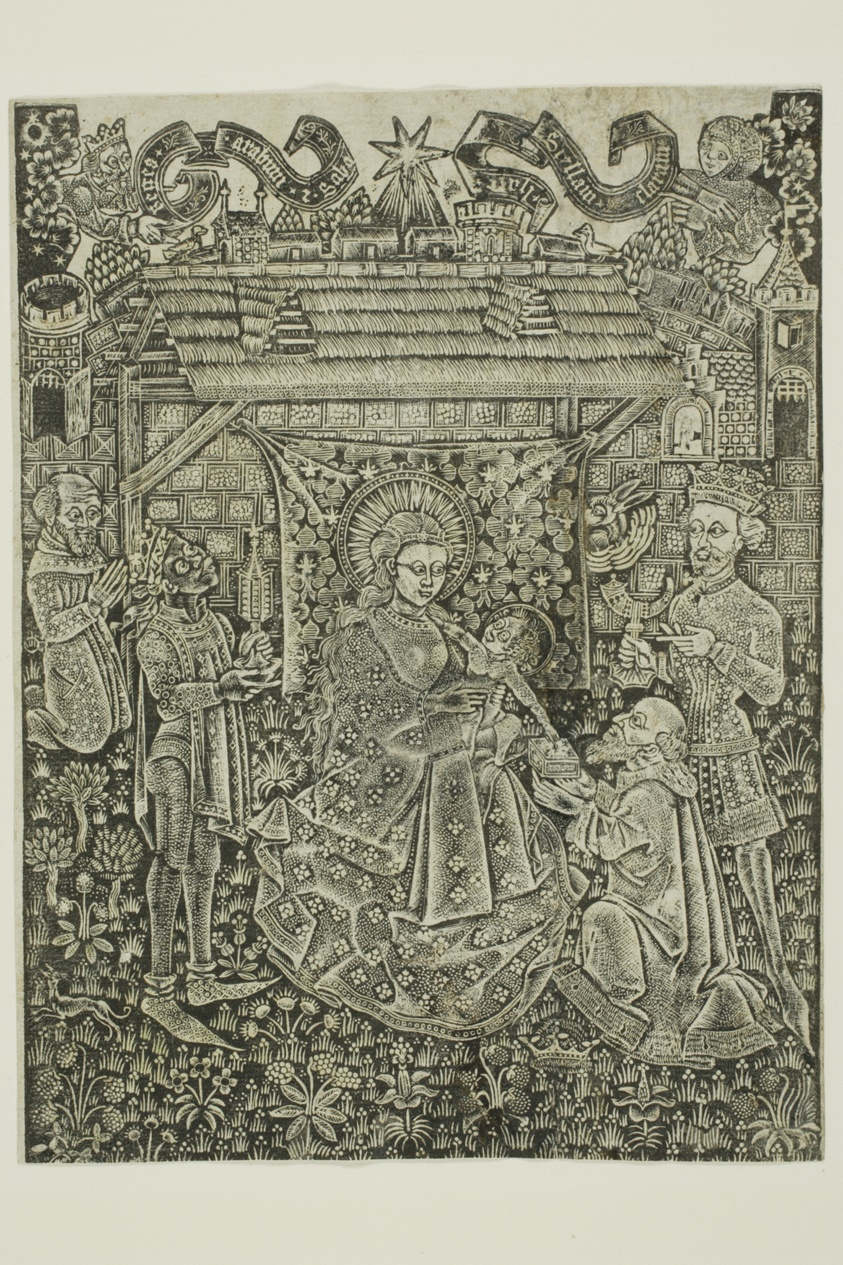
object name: Print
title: Adoration of the Magi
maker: Unknown Artist; German, 15th century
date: 1425–50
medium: Metalcut on paper (dotted manner)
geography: Germany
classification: engraving; print; prints and drawing